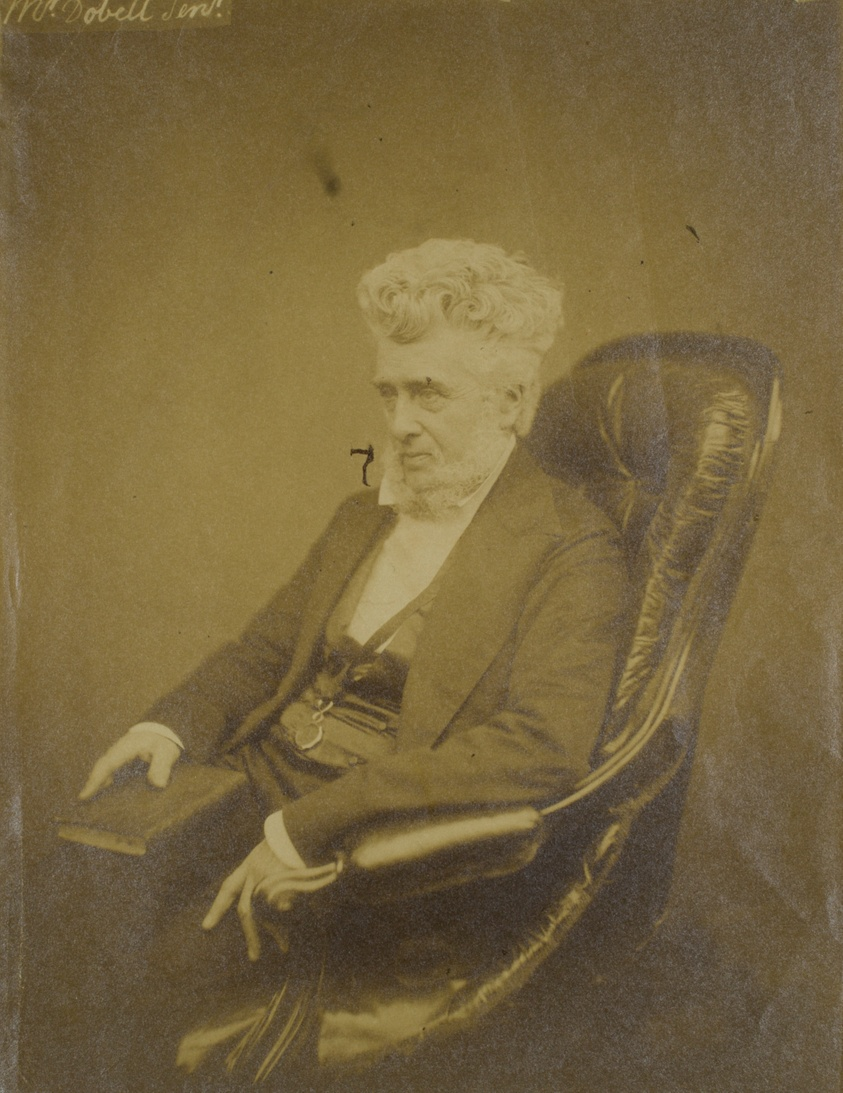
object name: Photograph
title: Mr. Dobell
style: 19th century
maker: Artist unknown; 19th century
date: c. 1860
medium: Albumen print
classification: photography; photographic process; photograph